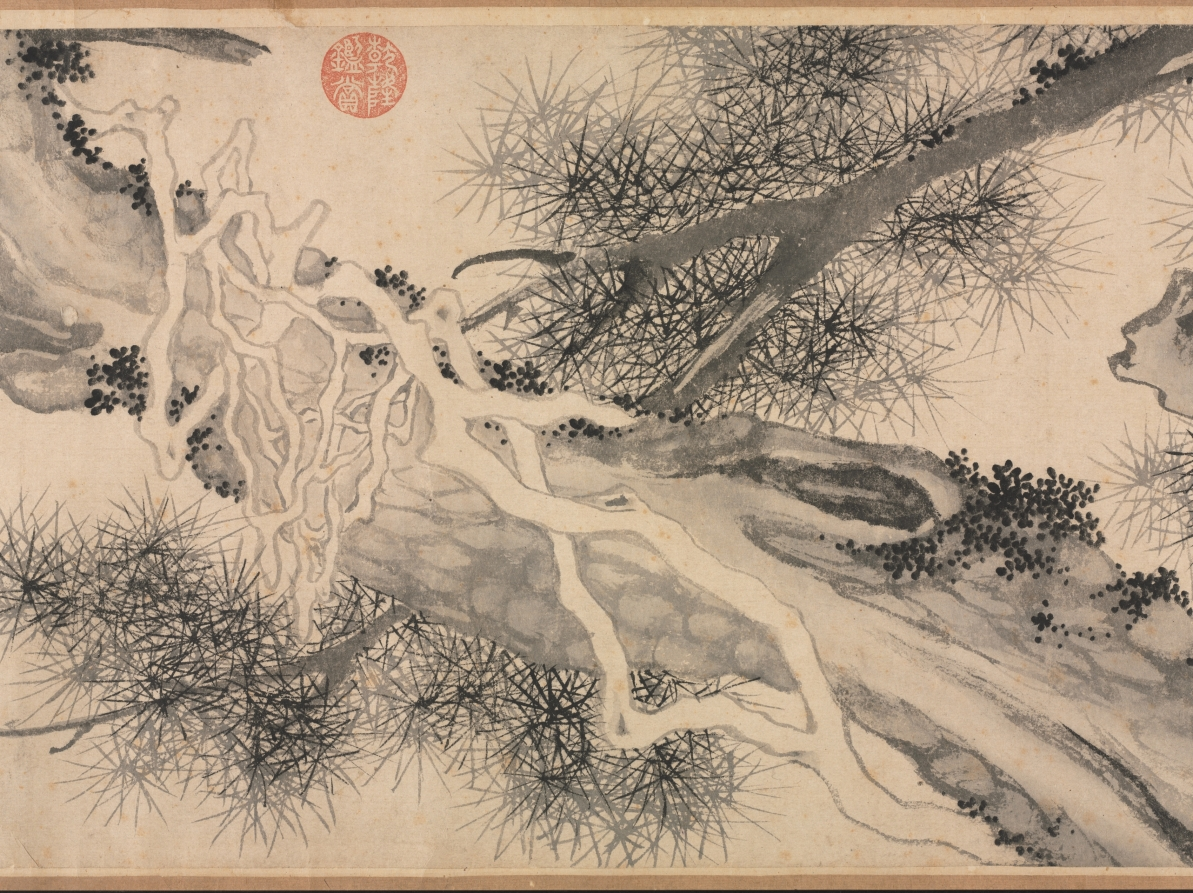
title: Old Pine Tree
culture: China, Ming dynasty (1368–1644)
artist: Wen Zhengming (Chinese, 1470–1559)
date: late 1530s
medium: handscroll; ink on paper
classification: Painting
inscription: 變化勢難縛，虬髯似戟森. 徵明 [印]文徵明印; 衡山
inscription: 2 partial seals of Qian Shisheng 錢士昇 (1575–1652)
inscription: 8 imperial seals: 6 of the Qianlong emperor (r. 1736–95); 1 of the Jiaqing emperor (r. 1796–1821); 1 of the Xuantong emperor (r. 1909–11).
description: Here the natural appearance of a gnarled and vine-entangled pine has been transformed into a rhythmic abstraction of brushstrokes and ink tonalities, with unifying opposites—opening and closing, rising and falling—that provide the design across the horizontal scroll. The artist's inscription reads: "The force of change beyond restraint; / The dragon's whiskers are likened to a forest of spears."